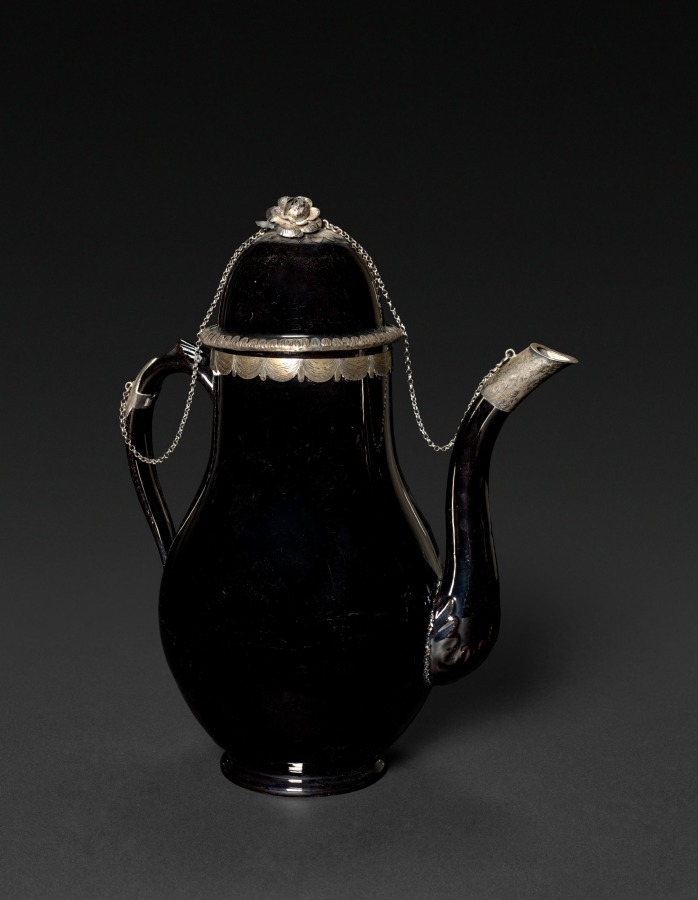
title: Coffee Pot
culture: Belgium, Namur(?), 18th century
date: c. 1780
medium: glazed stoneware with silver colored metal mounts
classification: Ceramic